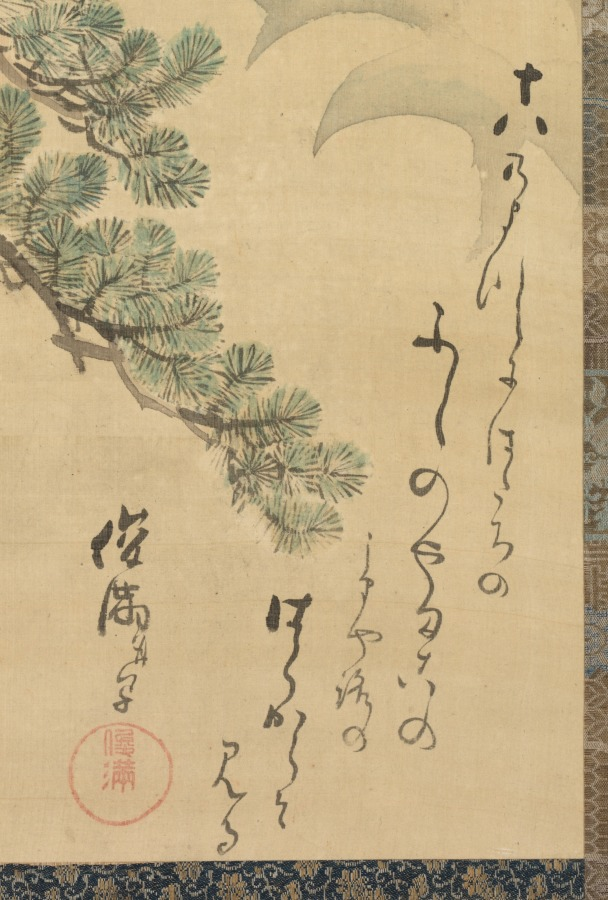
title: Mt. Fuji through Pines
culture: Japan, Edo period (1615–1868)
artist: Kubo Shunman (Japanese, 1757–1820)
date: late 1700s-early 1800s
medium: hanging scroll, ink and color on silk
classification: Painting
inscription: Signed: painted by Shunman and others (Shunman narabi utsu [su]) Sealed: Shunman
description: Kubo Shunman dashed off this loose image of Mt. Fuji viewed in the distance from behind pine trees as a performance painting, or sekiga. He did it on the spot in the company of members of his poetry club. Six of them, including the club's founder Yadoya no Meshimori (Rokujuen, 1753–1830), added kyoka poems, 31-syllable poems like the classical Japanese waka poem in form, but with a heavy emphasis on humor. Shunman jotted down a poem as well, in the bottom right corner of the painting, before signing and sealing it. Each poem takes the painted image as its point of departure.